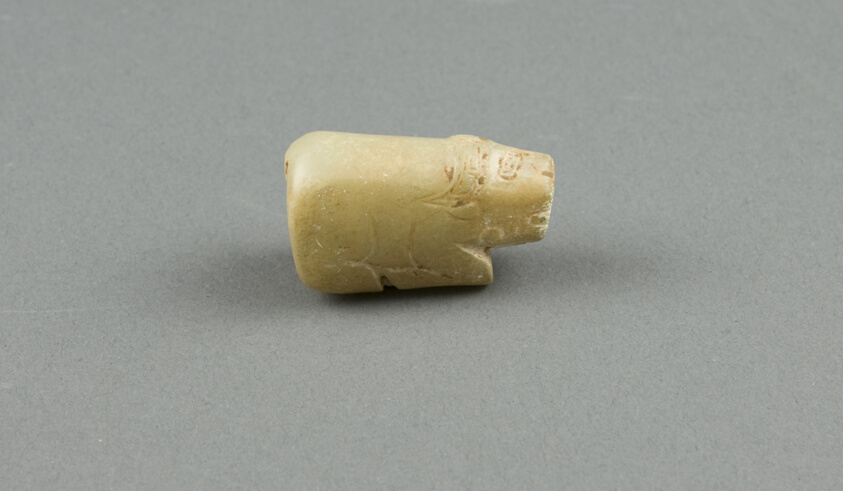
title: Bead, crouching buffalo.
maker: China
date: Shang dynasty (c.1600–1046 BCE)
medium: Jade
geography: China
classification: jade; asian art